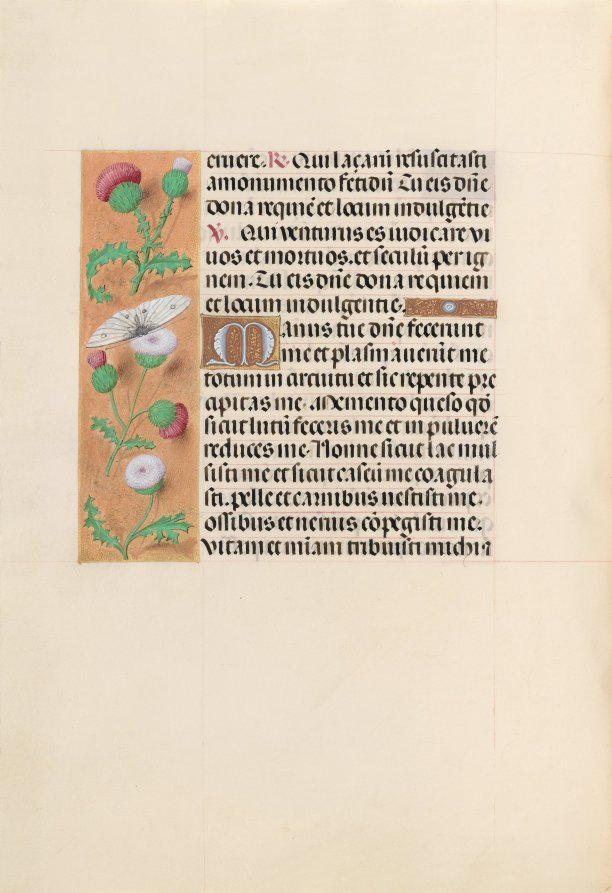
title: Hours of Queen Isabella the Catholic, Queen of Spain: Fol. 232v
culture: Flanders, Ghent and Bruges, late 15th century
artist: Master of the First Prayerbook of Maximillian (Flemish, c. 1444–1519)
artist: and Associates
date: c. 1500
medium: ink, tempera, and gold on vellum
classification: Bound Volume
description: This manuscript was illuminated by a circle of at least five highly organized manuscript painters active in the Flemish cities of Ghent and Bruges. The principal illuminator was Alexander Bening, who painted the majority of the book's miniatures. Manuscripts produced by this circle of artists are renowned for the decoration of their borders, which typically feature a rich variety of realistically-painted flowers, birds, and butterflies. This prayer book, called a book of hours, was intended not for a cleric, but for the private devotions of a lay person-in this case, Isabella the Catholic, Queen of Spain (1451-1504). Isabella's coat of arms embellishes the book's frontispiece. It is unlikely that the book was commissioned by the Queen herself; rather, she probably received it as a diplomatic gift from someone courting her patronage, perhaps Cardinal Francisco Jimenez de Cisneros. A Franciscan friar, Jimenez was dependent upon Isabella for his advancement, first to the post of Queen's confessor in 1492, and then to Archbishop of Toledo in 1495.